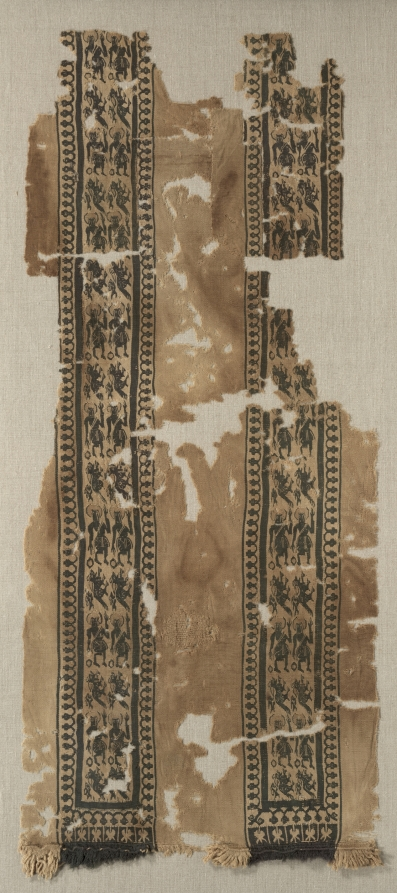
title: Fragment of a Tunic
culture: Egypt, Byzantine period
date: 400s–600s CE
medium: wool: tabby ground, inwoven tapestry ornament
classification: Textile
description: Tunics with decoration on the front and back were worn by both men and women. These long bands, called clavi, feature pairs of stylized haloed figures gesturing, possibly in dance, and wearing short skirts with scarves across their chests. They alternate with pairs of foxes (?) and fish. The ancient repair in the lower center of this woolen winter tunic reveals that decorated cloth was expensive, and thus often mended and reused.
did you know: The dark blue dye is made from indigo.